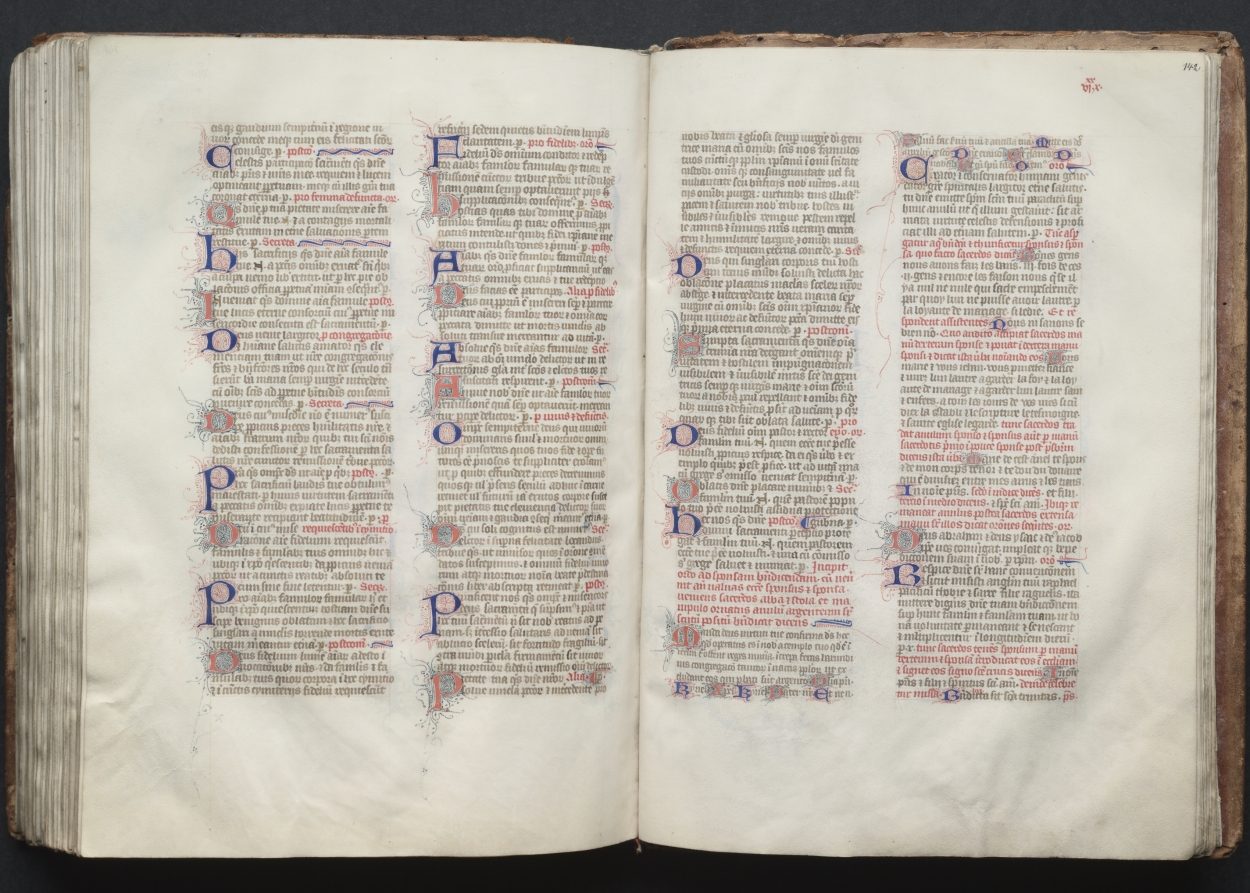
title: The Gotha Missal: Fol. 141v, Text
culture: France, Paris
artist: Master of the Boqueteaux (French)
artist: and Workshop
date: c. 1375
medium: ink, tempera, and gold on vellum; blind-tooled leather binding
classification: Bound Volume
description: The style and quality of this manuscript's decoration is typical of deluxe Parisian books made for aristocratic or royal patrons. Most of the book's decoration appears to be the work of the Master of the Boqueteaux, an artist active at the court of King Charles V (died 1380). His style was apparently shared by a number of book illuminators working in and around Paris. It is very possible that the Gotha Missal belonged to Charles V, but is not provable because the manuscript has no royal portraits and lacks a colophon. Given the book's magnificent decoration, however, it would seem that it was produced for a Valois prince, if not for the king himself. The manuscript receives its name from the German dukes of Gotha, its later owners.